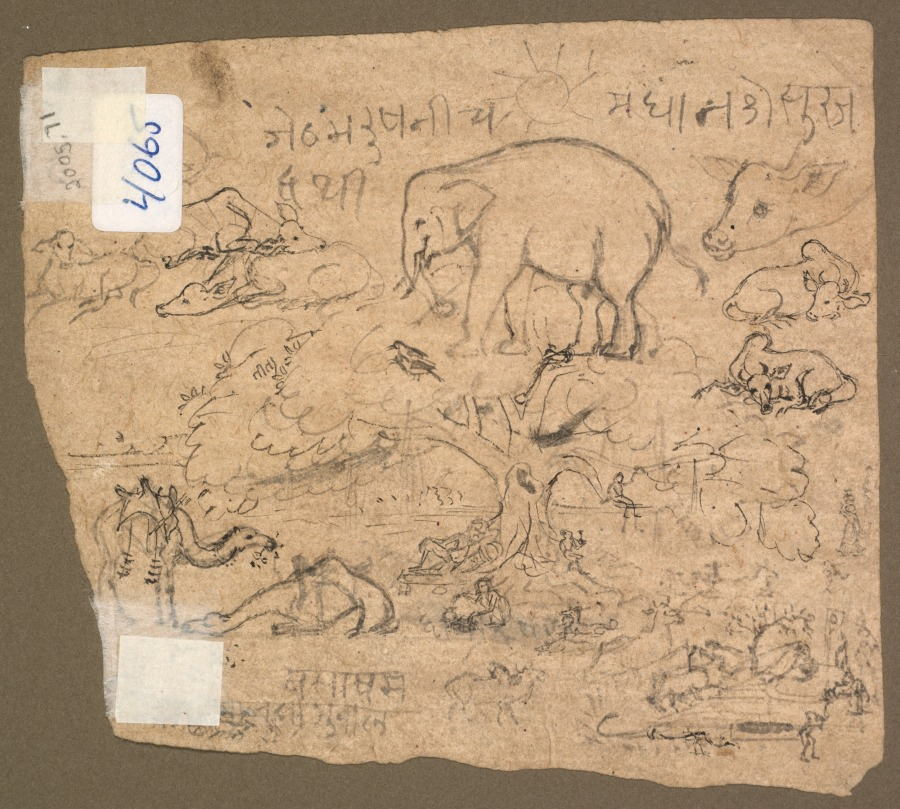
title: Sketch of a Woman with an elephant and other animals on reverse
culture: India, Pahari, 18th century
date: 1700s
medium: pencil and ink on paper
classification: Drawing